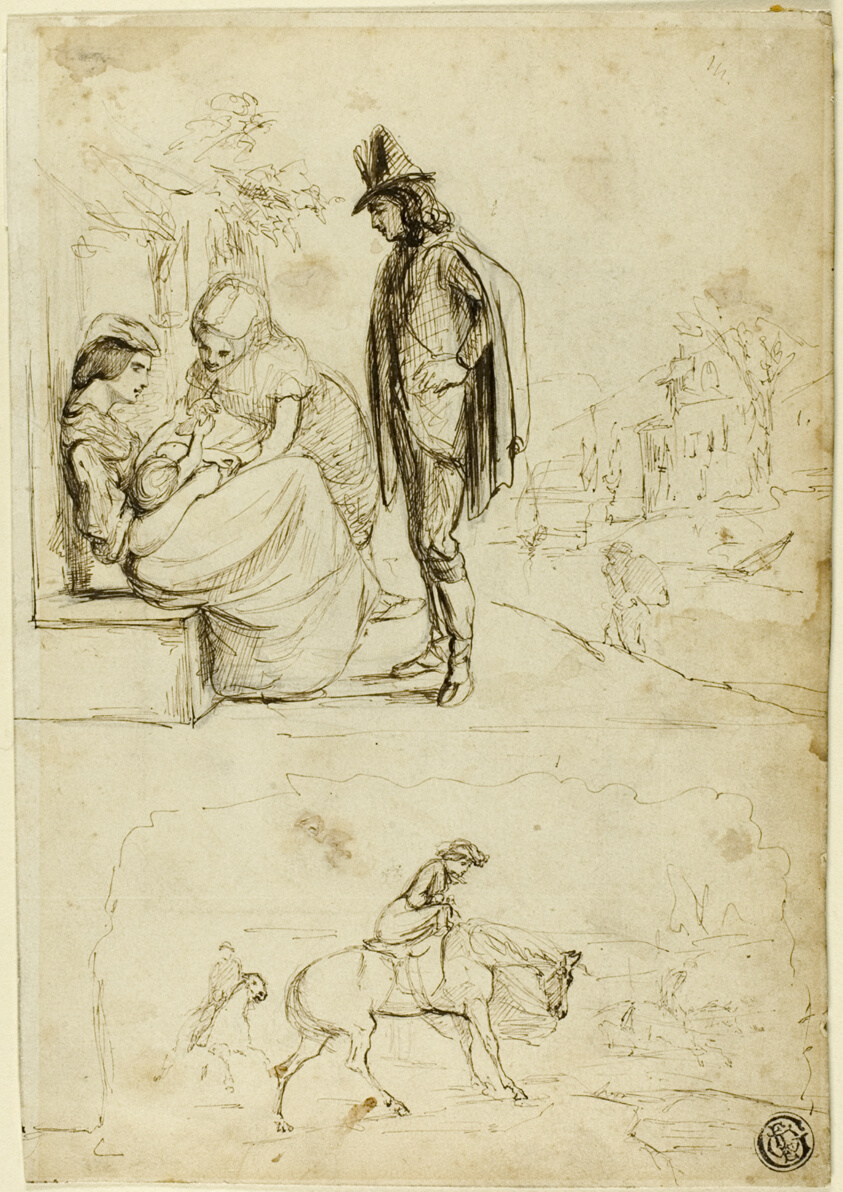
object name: Drawing and Watercolor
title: Two Sketches: Two Women and Baby with Man Looking On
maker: George Louis Pamella Busson Dumaurier; French, 1834-1896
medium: Pen and brown ink on tan wove paper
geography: France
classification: pen and ink drawings; drawings (visual works); prints and drawing